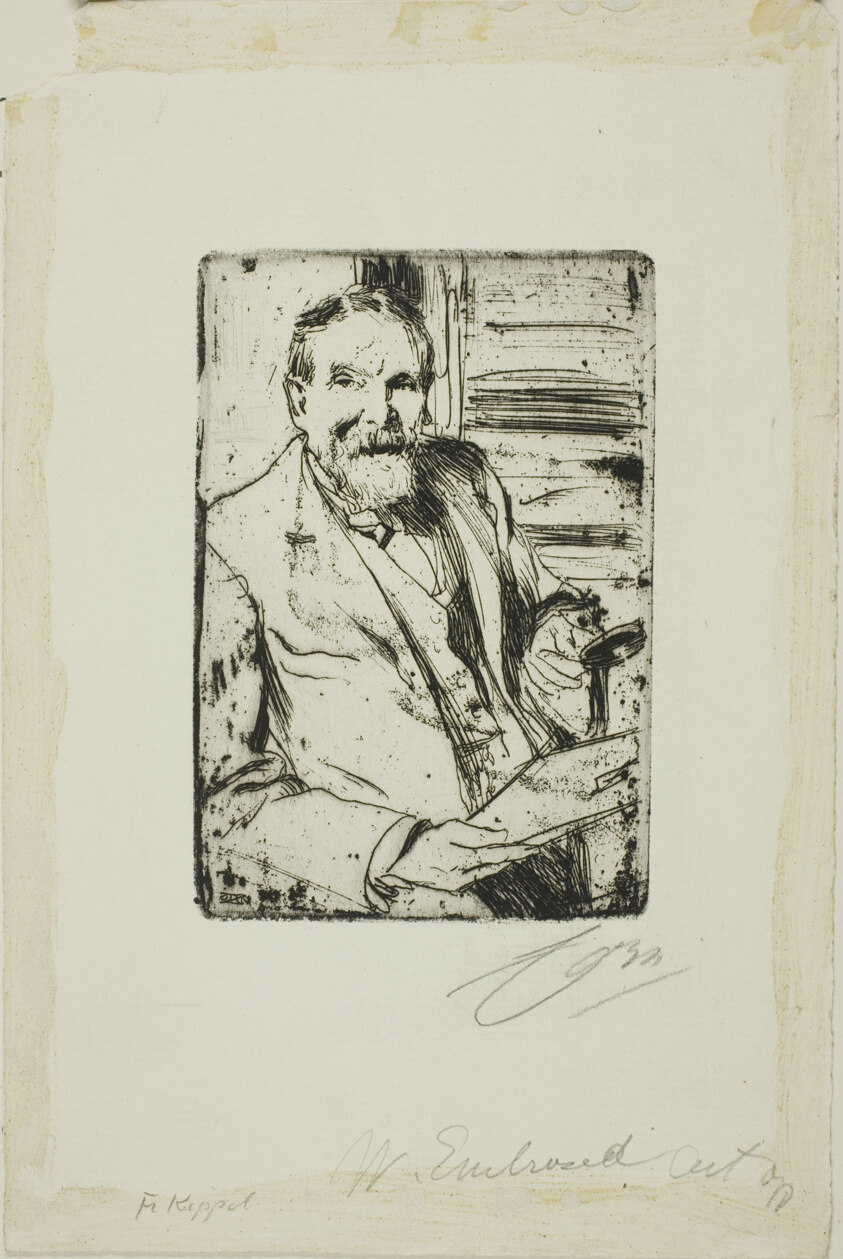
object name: Print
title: Frederick Keppel II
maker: Anders Zorn (Swedish, 1860-1920)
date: 1898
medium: Etching on ivory laid paper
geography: Sweden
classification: etching; print; prints and drawing